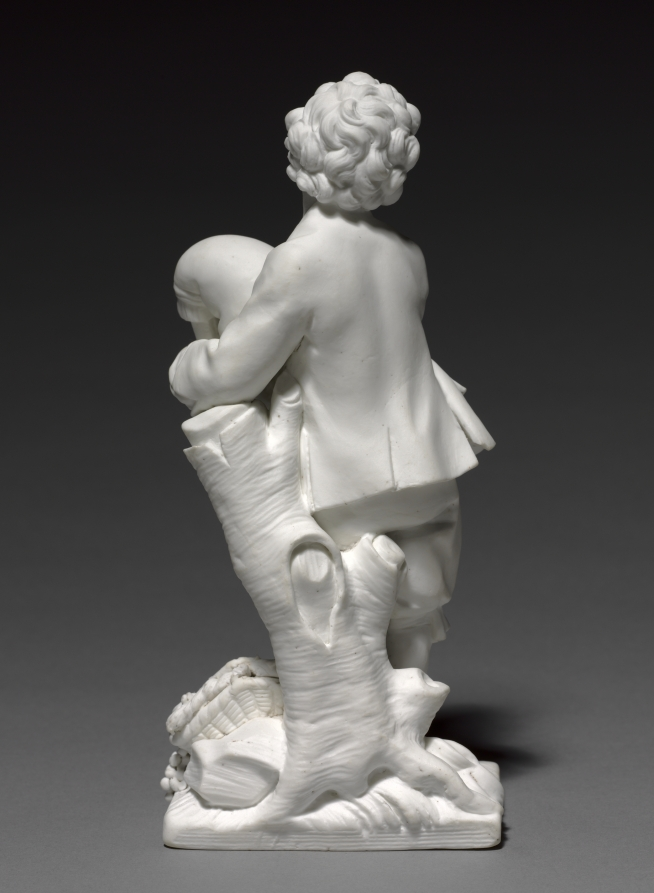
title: Figure of the Bagpiper (Le Joueur de musette)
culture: France, Vincennes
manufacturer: Vincennes Porcelain Factory (France, 1740–56)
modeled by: Pierre Blondeau (French)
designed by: François Boucher (French, 1703–1770)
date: 1748–52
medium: unglazed soft-paste porcelain (biscuit)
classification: Ceramic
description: Although a few Vincennes porcelain figures exist that are glazed, the royal factory adopted at an early date the practice of producing unglazed biscuit figures that, because of the purity of their material, resemble marble figurines. The fashion for biscuit figures first introduced at Vincennes quickly spread through Europe.